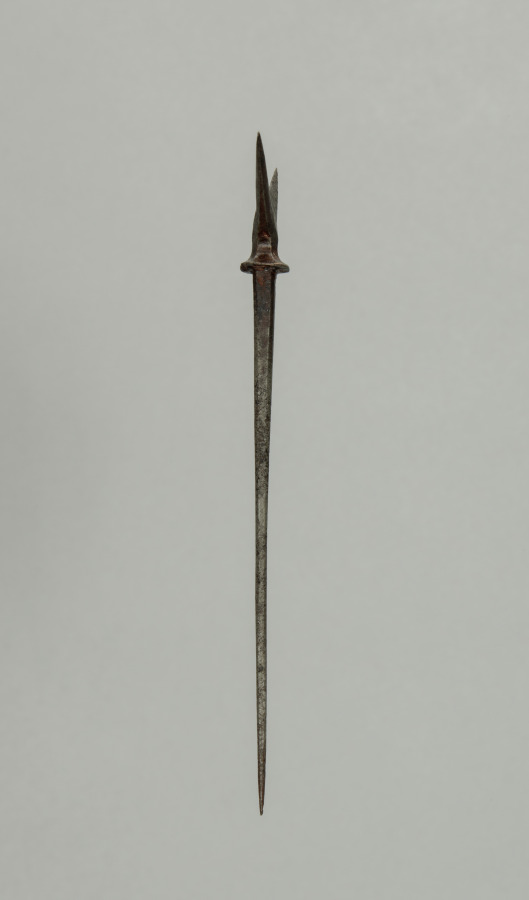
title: Arrow Point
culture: Japan, Edo period (1615–1868)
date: 1700s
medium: steel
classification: Arms and Armor